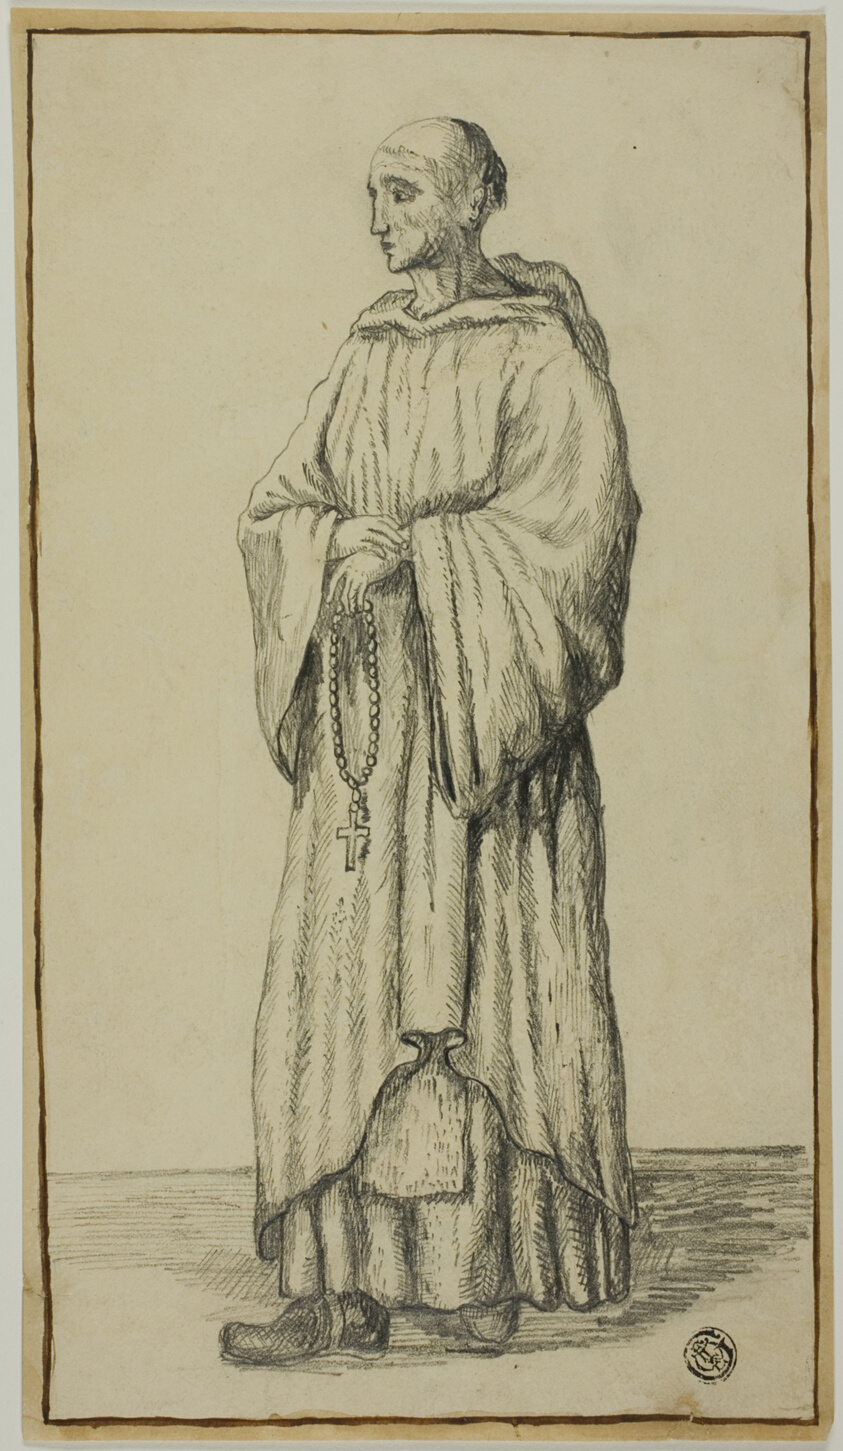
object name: Drawing and Watercolor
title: Standing Monk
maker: Unknown Artist; European, 17th/18th century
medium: Graphite on cream wove paper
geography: Europe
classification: graphite; drawings (visual works); prints and drawing